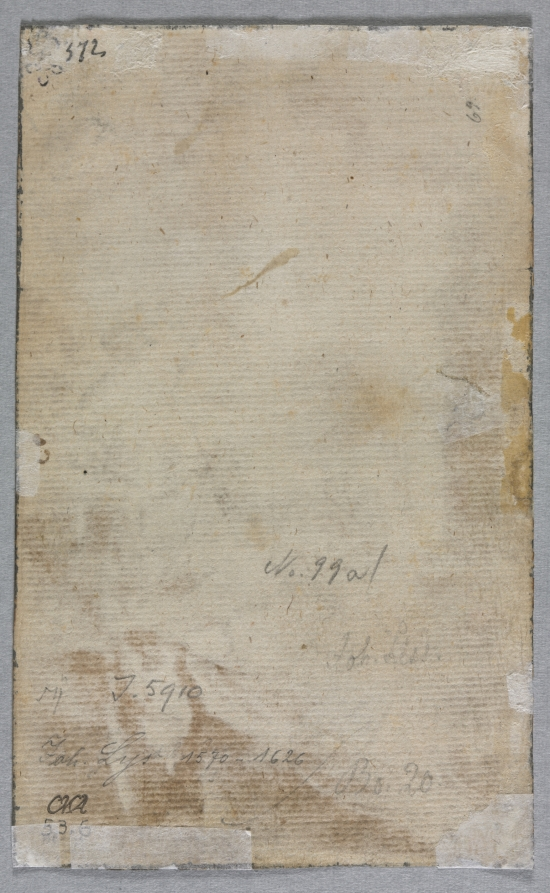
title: Allegory of Christian Belief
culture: Germany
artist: Johann Liss (German, c. 1597–1631)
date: c. 1622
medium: pen and brown ink and brush and brown wash; framing lines in pen and black ink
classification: Drawing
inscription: signed, lower right, in brown ink: Johan Liss / Mahler [illegible] / Holsati[a][masked] ; by artist, upper right, in brown ink: Alle Kunst undt widtz ist / eitel staub. / Hoch weisheidt ist ann. / Christum gelaub. ; by artist, lower right, in brown ink: Zu Rom den 19 martis Ao ["o" in superscript] 16[illegible, final two numbers abraded] ; upper left, in brown ink: + [collector's mark?]; upper right, along right edge, in brown ink: 265 [sideways] ; VERSO, upper left, in ink: 572 ; upper right, in graphite: 69 [sideways] ; center, in graphite: No. 99 al ; lower right, in graphite: Joh. Liss. [erased] ; lower left, in graphite: mj [?] ; lower left, in graphite: T5910 ; lower left, in graphite: Jah. Lys 1570-1626 ; lower right, in graphite(?): Bo. 20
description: This exceedingly rare drawing is one of only two signed sheets by Liss, who, in spite of the brevity of his career, was one of the most important German-born painters of the 17th century. Here, faith is personified as a woman with bared breasts and bare feet, symbolic of true Christian belief: plain, pure, and without artifice. She has cast aside worldly things-a crown, scepter, and book-and gazes heavenward as smoke wafts from an urn. The long inscription indicates that the sheet is from an album amicorum, or friendship book, in which drawings, poems, and autographs were collected as souvenirs of acquaintanceships. Liss may have made the drawing to dazzle an influential recipient with his inventive interpretation of a traditional religious subject.